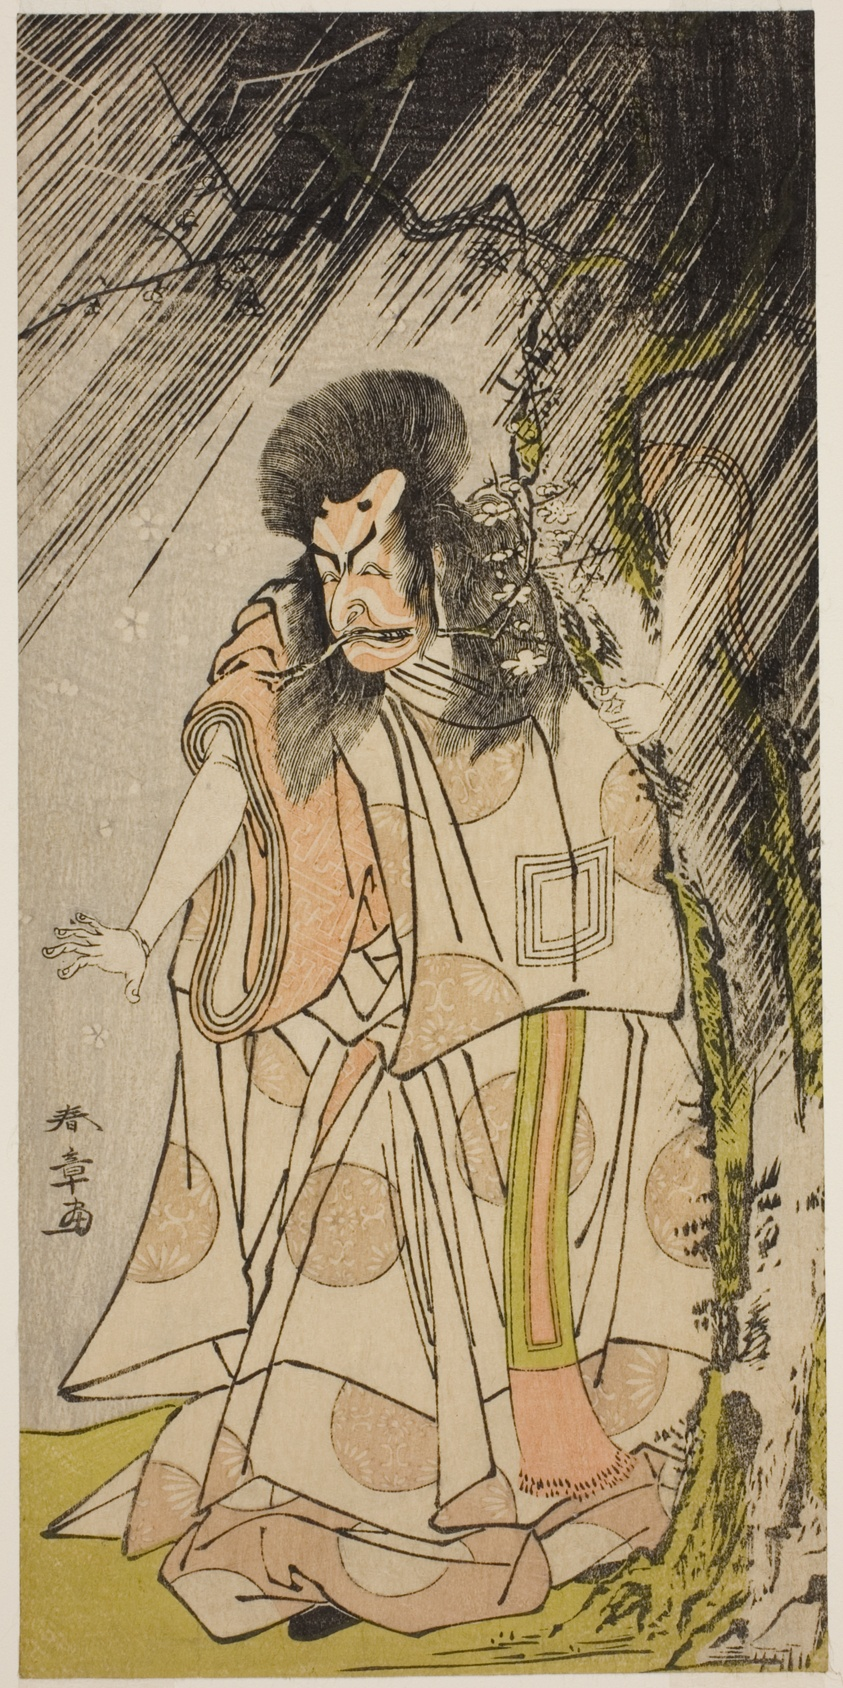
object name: Print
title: The Actor Ichikawa Ebizo III as the Thunder God, an Incarnation of Sugawara Michizane, in the Play Sugawara Denju Tenarai Kagami, Performed at the Ichimura Theater in the Eighth Month, 1776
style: Japanese (culture or style)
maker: Katsukawa Shunsho 勝川 春章; Japanese, 1726-1792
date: c. 1776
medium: Color woodblock print; hosoban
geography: Japan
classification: woodblock print; print; asian art